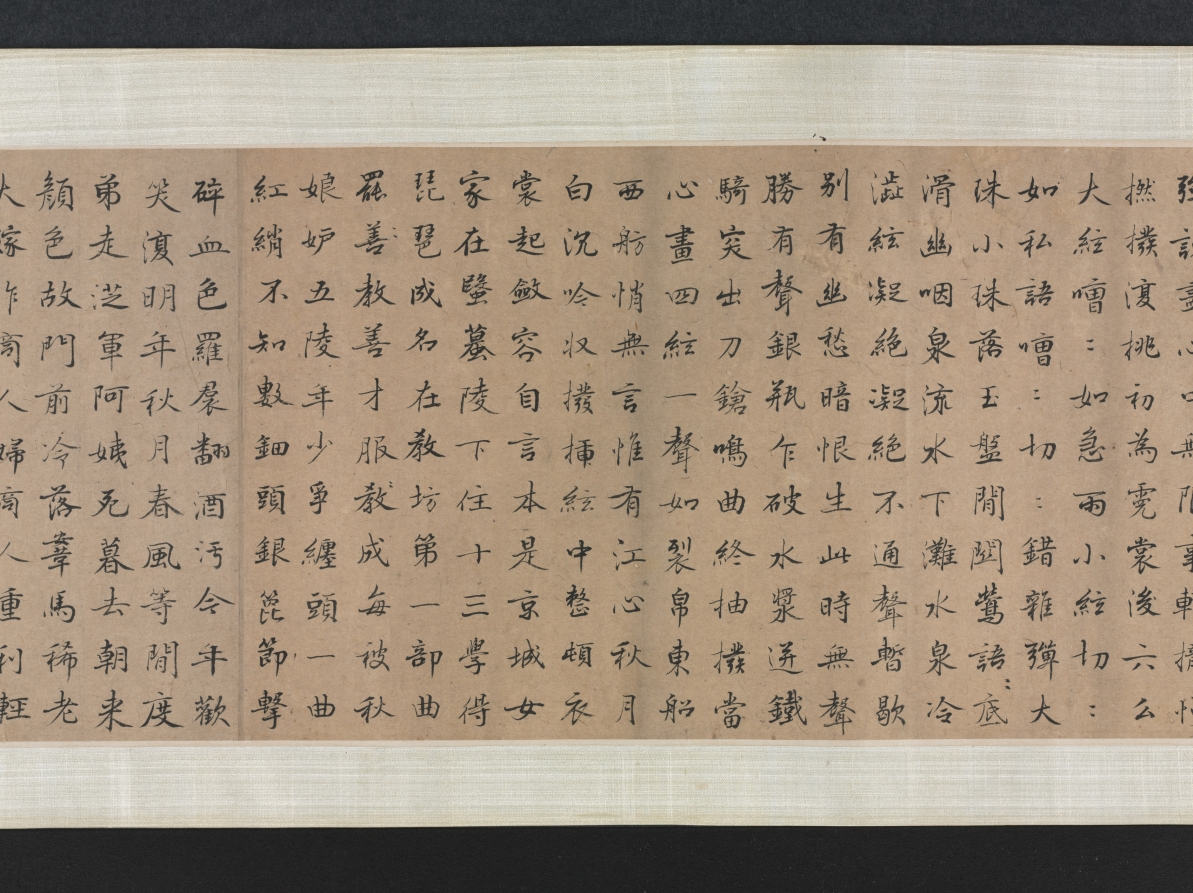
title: Saying Farewell at Xunyang (Song of the Pipa)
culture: China, Ming dynasty (1368–1644)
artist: Wen Boren (Chinese, 1502–1575)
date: 1500s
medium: handscroll, ink and color on paper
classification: Painting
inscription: "潯陽送客圖" 五峰山人文伯仁寫于停雲館中 [印] 文伯仁; 五峰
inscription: 2 colophons and 9 additional seals: 1 transcription of "Pipa xing 琵琶行” (Song of Pipa) and 3 seals of Zhu Yizun 朱彜尊 (1629-1709); 2 seals of Wu Rongguang 吳榮光 (1773-1843); 1 colophon, dated 1826, and 3 seals of Wu Xijia 吳錫嘉 (mid-1700s)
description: This handscroll depicts The Song of the Pipa, a poem by Bai Juyi 白居易 (772–846) written after the poet’s encounter with a pipa player on the Yangzi River. Expelled from her home city when her beauty and fame had faded, she played for the poet at night. Her musical performance and tragic life story resonated with Bai Juyi, who had just been demoted and exiled from life at court himself. The hazy, vast view and pale color tonalities of this painting illustrate these feelings of endless sadness, having lost one’s sense of purpose in life.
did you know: Wen Boren depicted the chilly autumn water with a fishnet pattern.